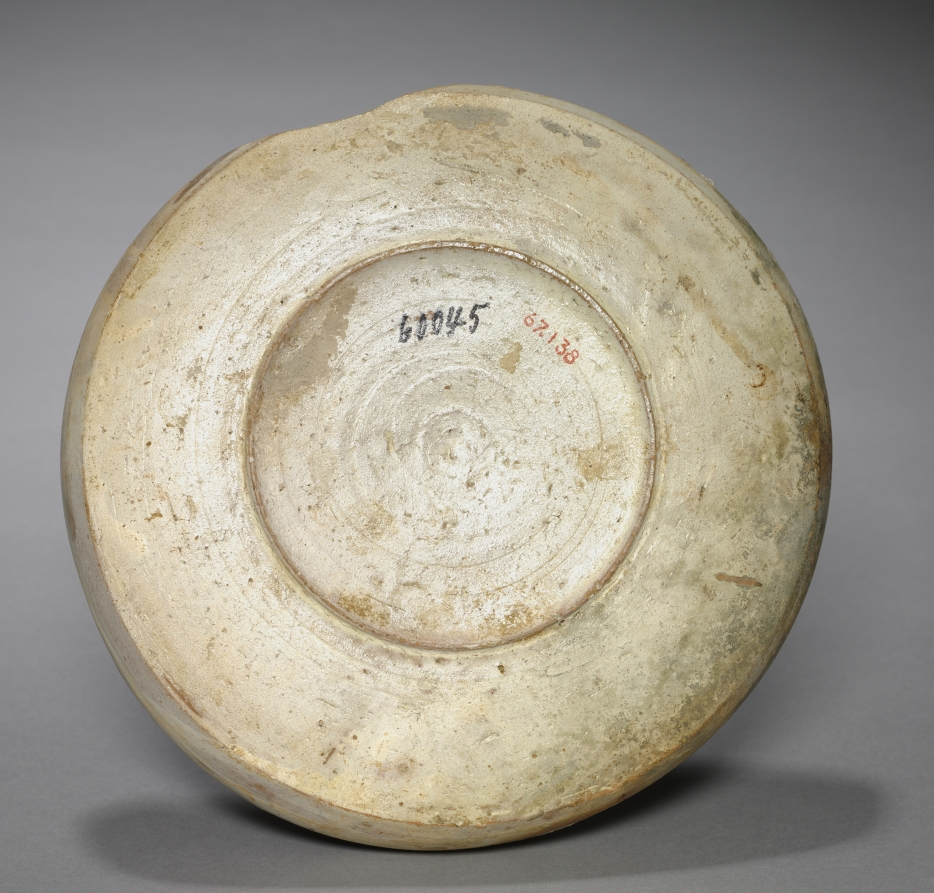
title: Deep Plate with Hawk, Rabbit, and Foliage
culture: Byzantium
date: 1100s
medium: sgraffito earthenware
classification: Ceramic